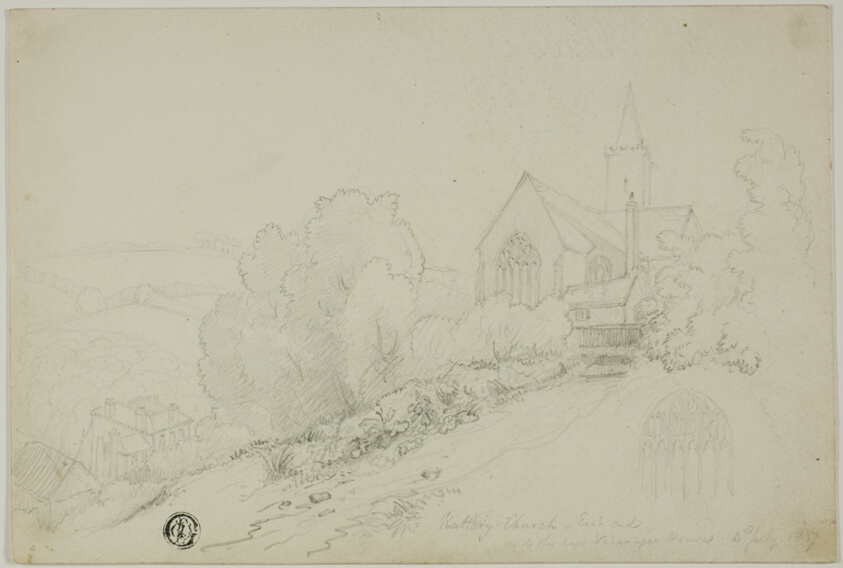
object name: Drawing and Watercolor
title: Rattery Church, East End and the new Vicarage House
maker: Unknown Artist; British, n.d.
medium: Graphite on cream wove card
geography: United Kingdom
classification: graphite; drawings (visual works); prints and drawing